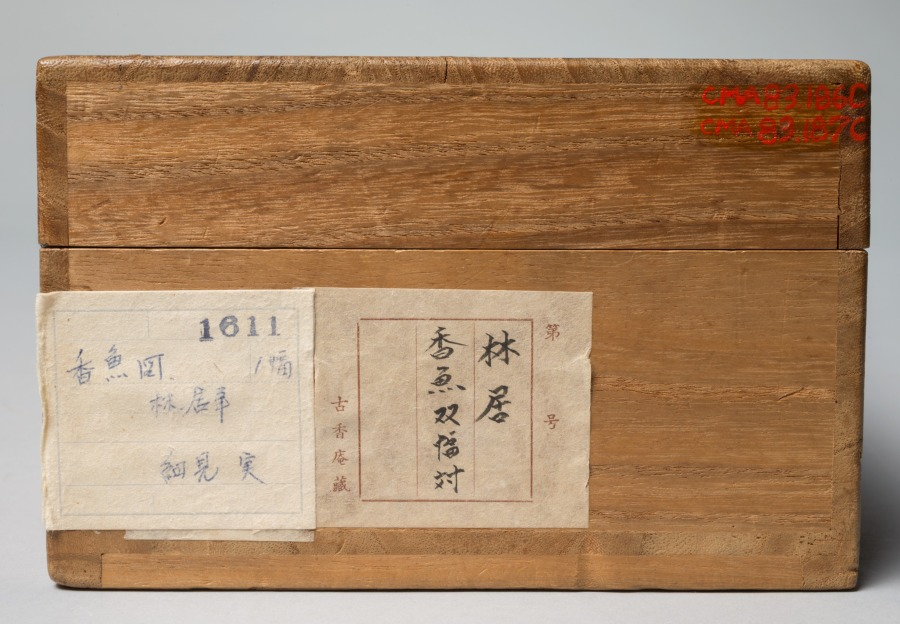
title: Fish and Rock; Fish and Seaweed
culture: Japan, Momoyama period (1573–1615)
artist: Rinkyo (Japanese)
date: 1573–1615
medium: pair of hanging scrolls; ink on paper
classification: Painting